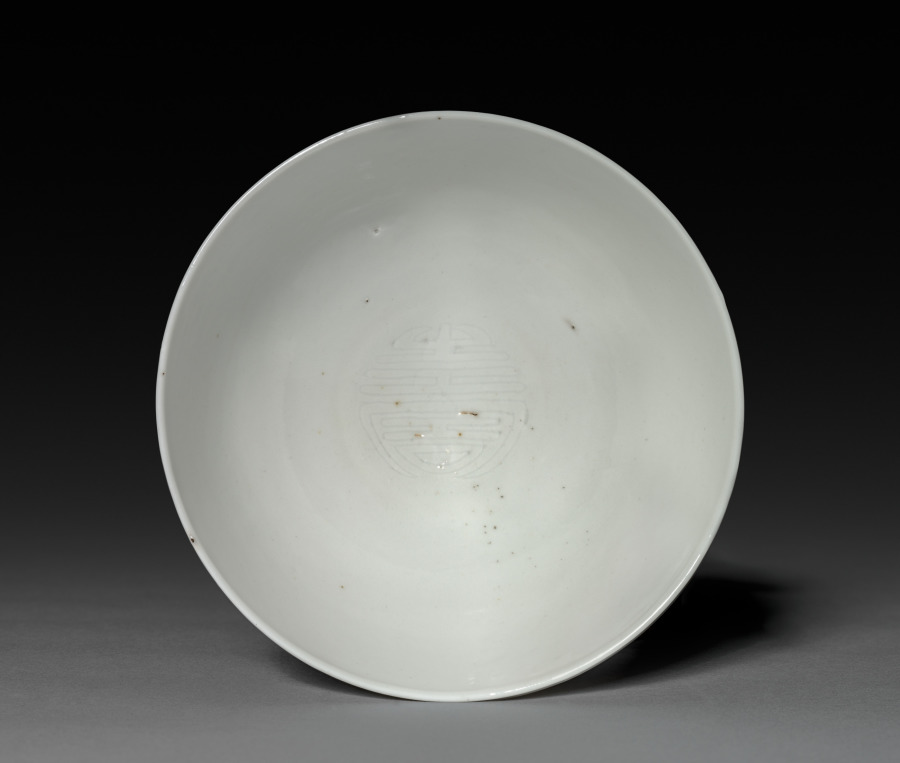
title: Bowl with Waterfowl on a Lotus Pond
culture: China, Jiangxi province, Jingdezhen kilns, Qing dynasty (1644-1911), Kangxi reign (1662-1722)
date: 1662–1722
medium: porcelain with famille verte overglaze enamel decoration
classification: Ceramic